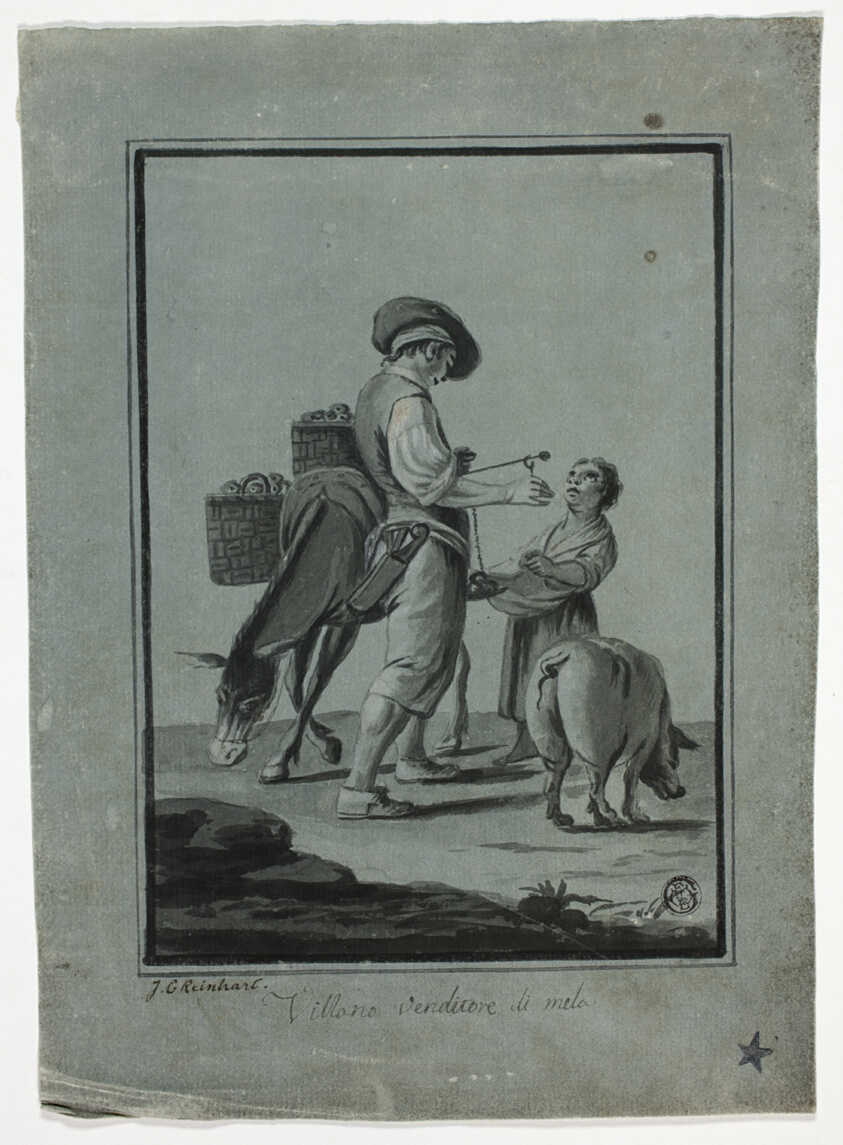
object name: Drawing and Watercolor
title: Peasant Apple Peddler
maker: Johann Christian Reinhart (German, 1761-1847)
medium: Pen and black ink, and brush and black and gray wash, heightened with lead white (discolored), on ivory laid paper, prepared with a blue wash ground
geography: Germany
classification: ink or chalk wash; drawings (visual works); prints and drawing